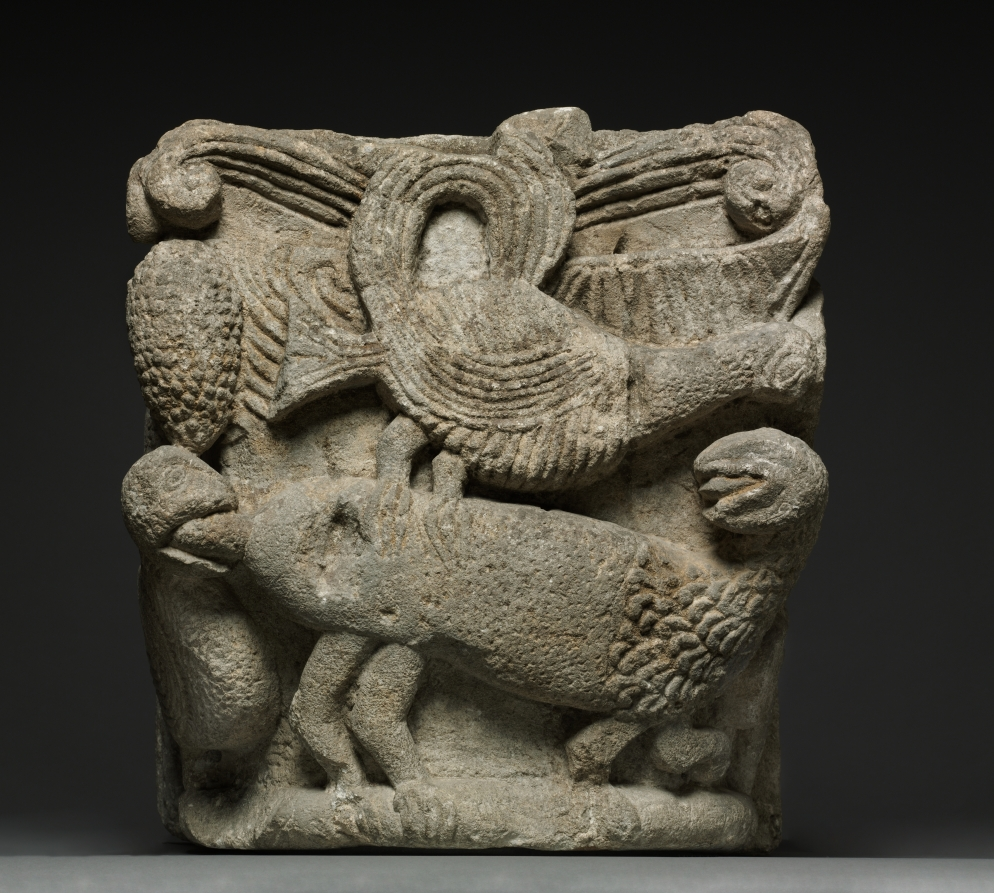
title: Engaged Capital with a Fantastic Creature and Three Birds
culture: Western France, Bordelais, early 12th century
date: early 1100s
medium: limestone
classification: Sculpture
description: The closest parallels for the dramatic, heavy style of this capital appear in the capitals of the porch of Saint-Seurin in Bordeaux.